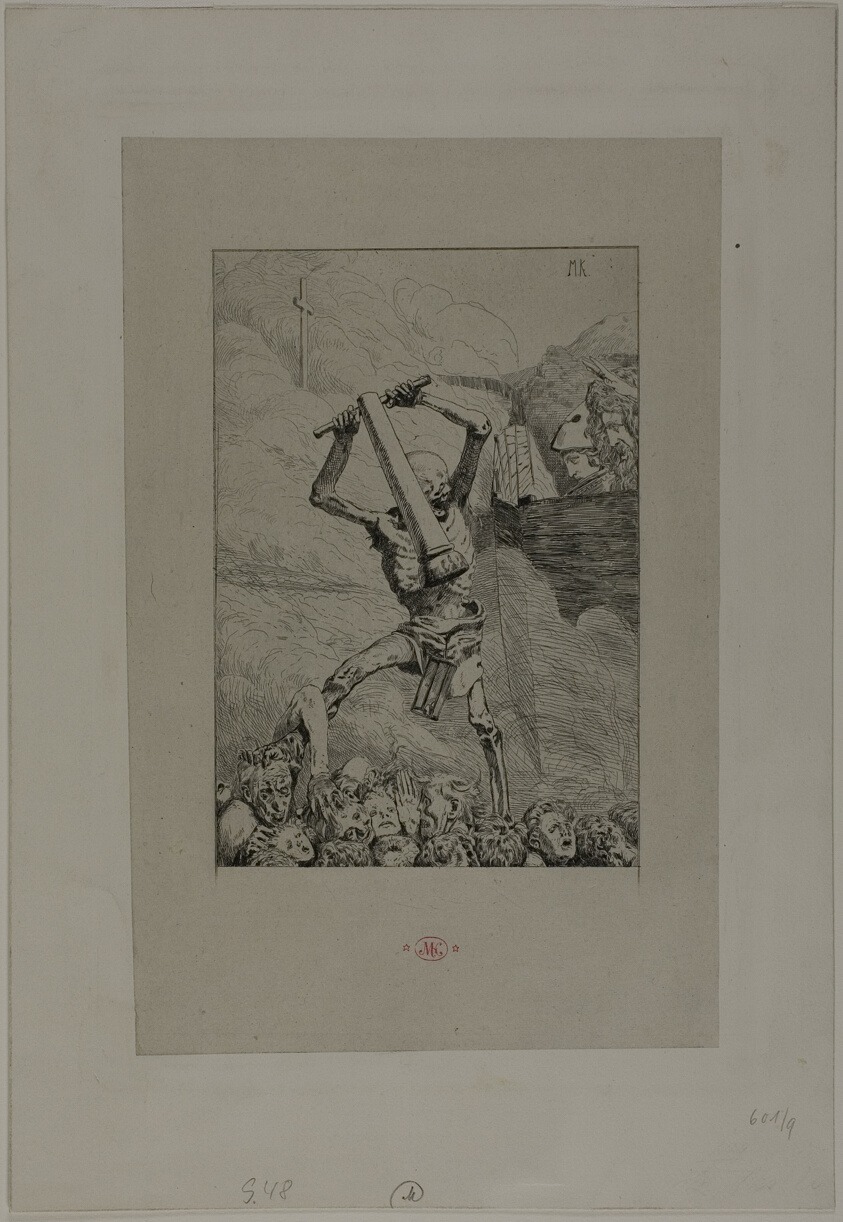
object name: Print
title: Third Future, plate six from Eve and the Future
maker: Max Klinger (German, 1857-1920)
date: 1880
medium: Etching on light gray wove paper, laid down on ivory wove card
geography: Germany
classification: etching; print; prints and drawing